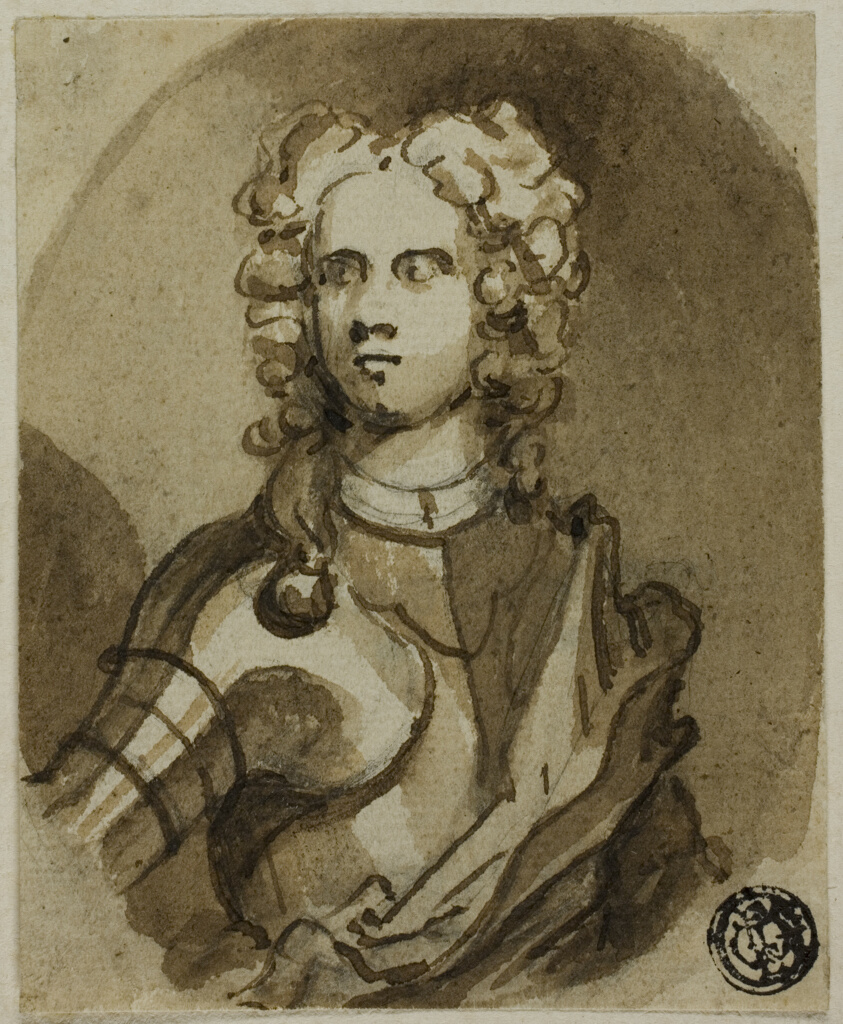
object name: Drawing and Watercolor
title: General Monk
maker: Attributed to Sir Peter Lely; English, 1618-1680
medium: Pen and brown ink, with brush and brown wash, over graphite, on cream laid paper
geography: England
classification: pen and ink drawings; drawings (visual works); prints and drawing